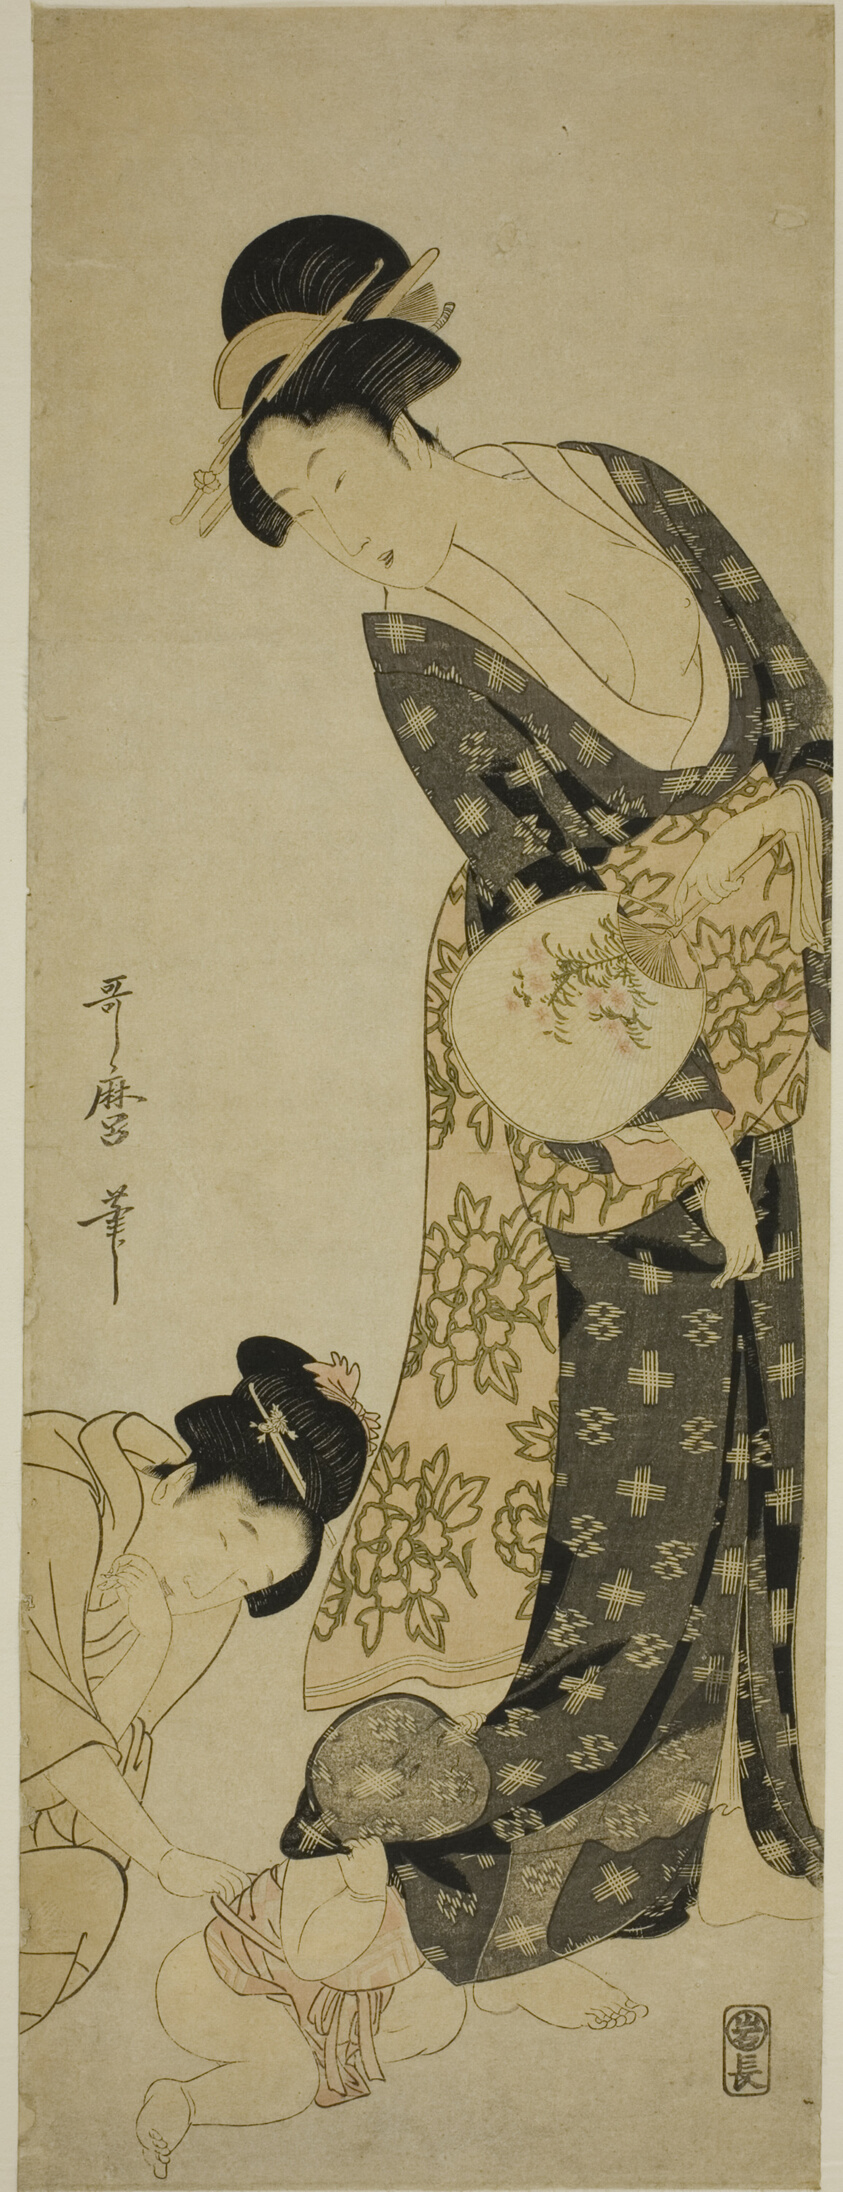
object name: Print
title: Mother and Child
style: Japanese (culture or style)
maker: Kitagawa Utamaro 喜多川 歌麿; Japanese, 1753 (?)-1806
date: c. 1800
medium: Color woodblock print; naga-oban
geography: Japan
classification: woodblock print; print; asian art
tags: mothers, parents